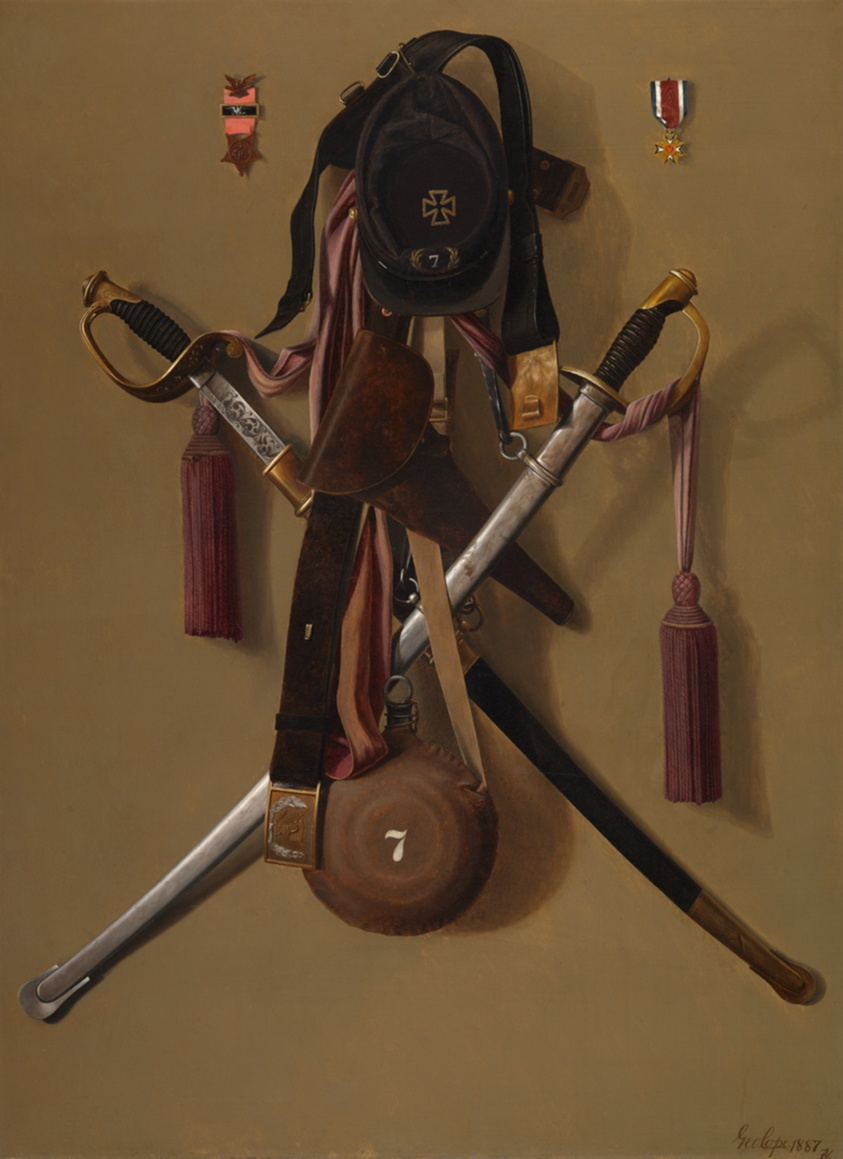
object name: Painting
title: Civil War Regalia of Major Levi Gheen McCauley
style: Realism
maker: George Cope (American, 1855–1929)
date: 1887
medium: Oil on canvas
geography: United States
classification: painting; american arts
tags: military, medals, swords, regalia